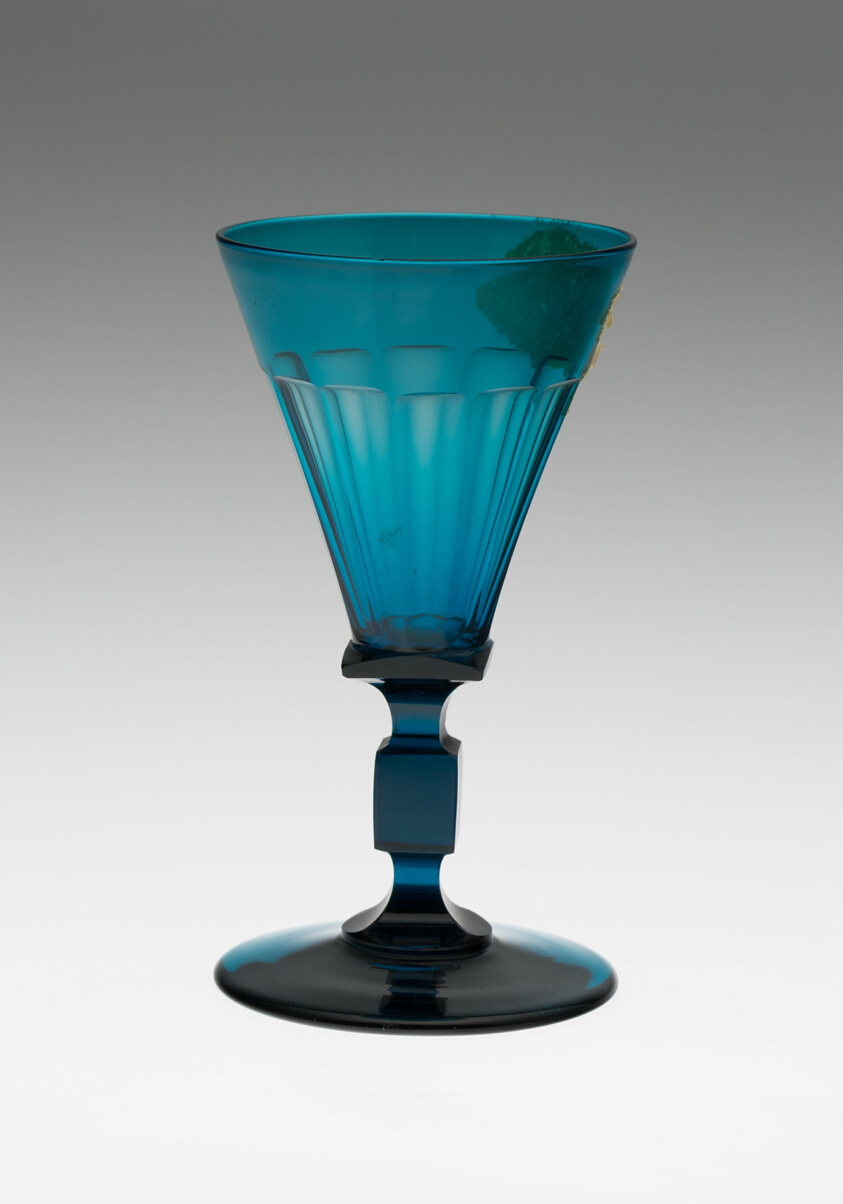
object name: Glass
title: Goblet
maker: Possibly Bohemia, Czech Republic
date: Mid 18th century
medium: Glass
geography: Bohemia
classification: drinking vessel; glass; european decorative arts